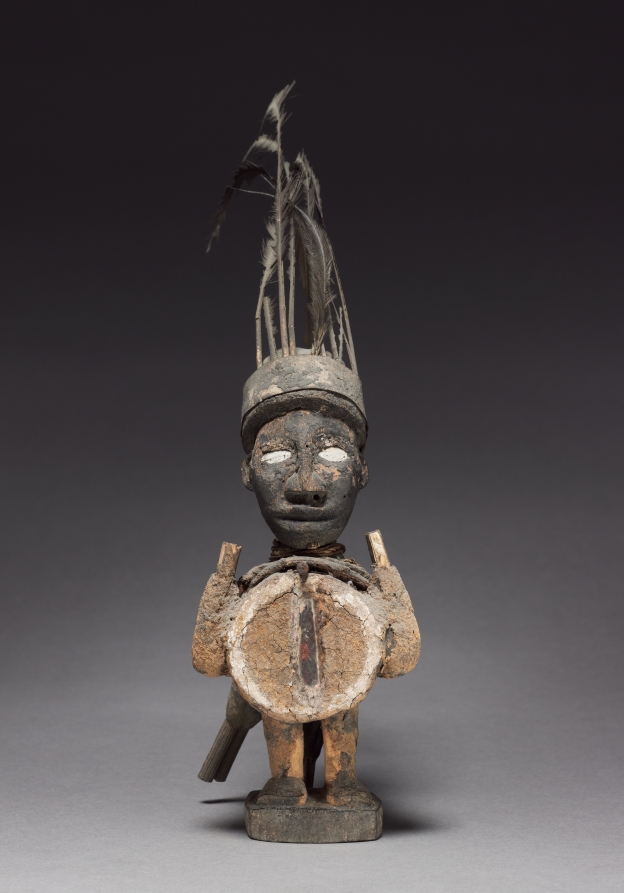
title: Power figure (nkisi)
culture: Africa, Central Africa, Republic of the Congo, Kongo-style maker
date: late 1800s-early 1900s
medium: Wood, metalized glass, organic materials (including resin), feathers, plant fibers, iron, and copper alloy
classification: Sculpture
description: One of seven minkisi figures previously in the René and Odette Delenne collection, this object contained medicines in which an ancestral spirit was believed to reside. This figure is one of the two tallest in the collection. Feathers of a bird of prey adorn its head, with two small guns pointing upward and a third hanging down. It had belonged to “the sorcerer of Louboulou.”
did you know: This is one of two tallest in the collection of spiritual figurines loaded with gunpowder to shoot at witches: nduda, or “night guns.”